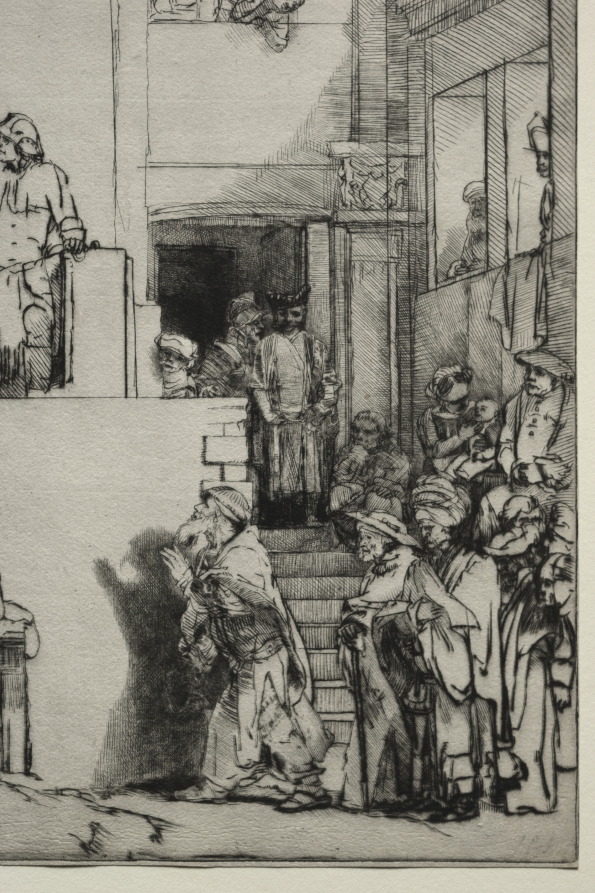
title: Ecce Homo. Christ Presented to the People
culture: Netherlands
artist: Rembrandt van Rijn (Dutch, 1606–1669)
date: 1655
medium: drypoint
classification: Print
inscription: Recto, upper left, in graphite: 79; lower left: FPS. Verso, in purple ink: Prince of Liechtenstein or Colnaghi for Liechtenstein stamp; in black ink, Zinser stamp, castle tower (rook chess piece); along side, in graphite: No. 36; along top: (illegible) name; upper left, in graphite: No 79 P(?) G (?) La Second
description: Rembrandt was an experimental and innovative printmaker and the first to execute works in pure drypoint on this monumental scale. Drypoint produces blurred lines and rich, velvety shadows, but these effects are lost as the plate wears. A limited number of rich impressions exist like this fine example of the fifth state, which demonstrates how Rembrandt redefined the expressive potential of printmaking. Rembrandt’s habit of drawing from life made him a keen observer of behavior and body language, endowing his biblical scenes with a human dimension and veracity not seen previously. The throng in Christ Presented to the People represents a cross section of the population and reflects the pictorial tradition that common humanity condemned Christ. Large areas of the imposing building, symbolizing the crushing weight and authority of the state, remain unworked so that blank white paper seems radiant in contrast to rich black shadows.